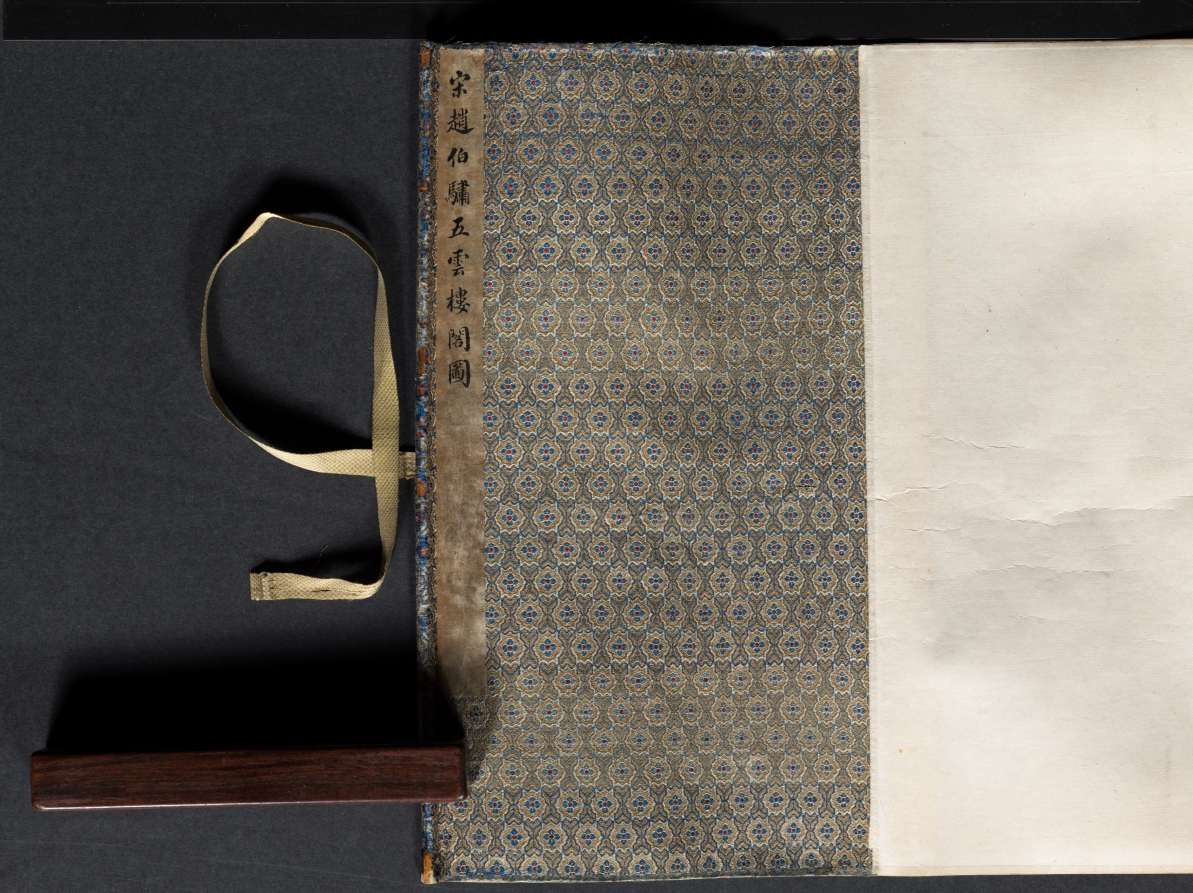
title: Landscape, The Palace of the Clouds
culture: China, Qing dynasty (1644-1911)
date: 1644–1911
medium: handscroll, ink on silk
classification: Painting